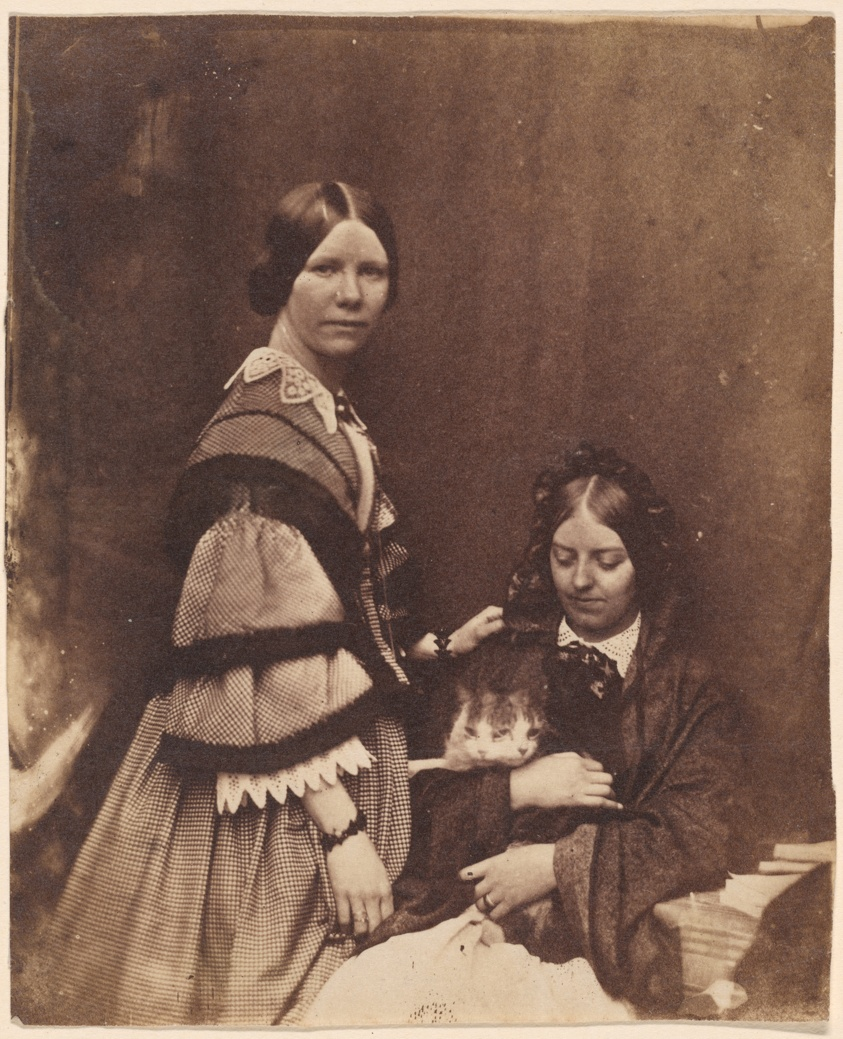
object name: Photograph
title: Mrs. Craik Holding Cat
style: 19th century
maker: Attributed to Benjamin Mulock (English, 1829–1863); English, 19th century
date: c. 1858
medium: Salted paper print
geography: England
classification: salted paper print; photographic process; photography; photograph